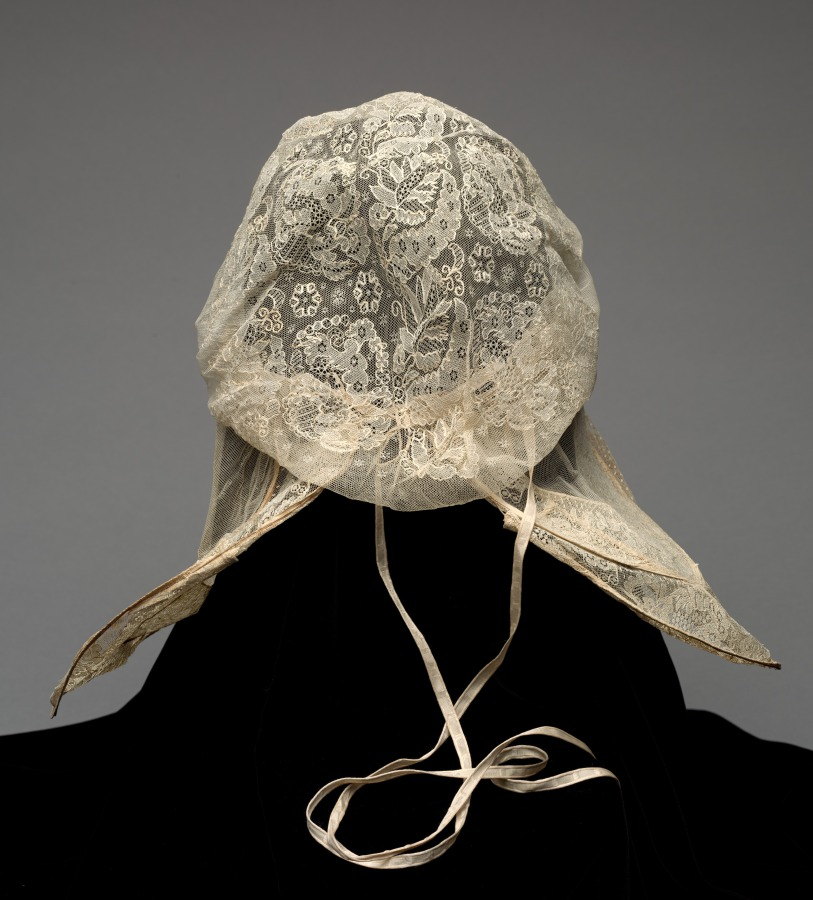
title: Lace Cap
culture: Netherlands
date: 1800s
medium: Net lace, embroidered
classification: Garment